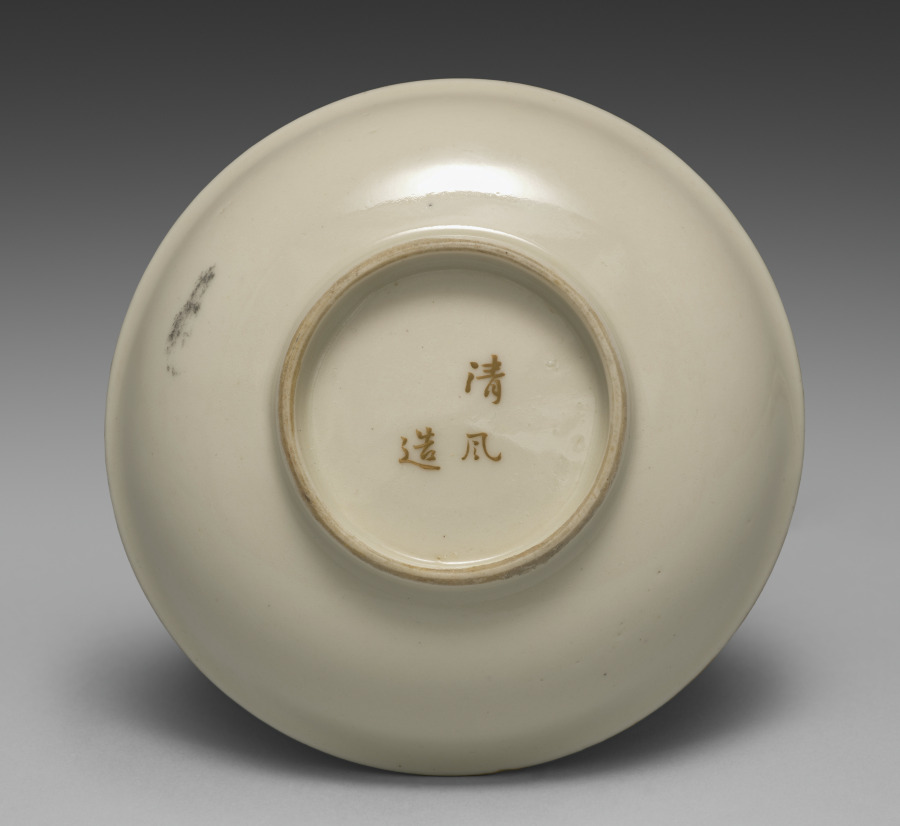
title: Small Dish from Dining Set with Plum Blossoms and Cracked-Ice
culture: Japan, Meiji period (1868–1912)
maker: Seifū Yohei II (Japanese, 1844–1878)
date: c. 1875–78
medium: Porcelain with molded designs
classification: Ceramic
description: Each item in this set has a delicate low-relief design of flowering plum branches over scattered, intersecting lines meant to resemble the cracked-ice surface of a frozen body of water and is signed on the base in gold pigment. While Yohei II produced many fine works in underglaze blue, like those produced by Kiyomizu Shichibei, he also made works in quite different styles later in his career, from the early 1870 s. In 1873, he was appointed purveyor to the Industrial Center of Kyoto Prefecture, a designation associated with Kyoto’s efforts to reach an international market through the port of Kobe; and from 1875 until his death, he was involved in national-level projects to present Japanese ceramics across the world. It was during this period that Yohei III was apprenticed to Yohei II, and it has been suggested that this set may in fact be an early example of Yohei III’s work, which he signed with his teacher’s name. Decorated with flowers resembling Japanese textile motifs, the set calls to mind the design of Yohei II’s pair of vases with plum blossoms in the Victoria and Albert Museum. Here, the elaborate trees created for a formal public exhibition setting have been translated into the approachable blossoms of the genteel domestic environment. While the designs are consistent across the pieces, each raised flower petal and pistil and each incised line in the ice was done by hand, so the cups, bowls, and dishes are similar yet unique. The bottoms of two boxes once identified the set’s owner, but the information has been deliberately obscured with black ink. However, inscriptions still visible appear to indicate two occasions, once at the end of July 1886 , and once again in June 1916 , when parts of the set were requested from Hokura in Niigata Prefecture. The location corresponds to a neighborhood in the present-day city of Jōetsu. The surname Tsuji 辻 also appears on a paper tag affixed to one of the box cloths. Future research may possibly reveal more about their provenance. A vase by Yohei III in a private collection combines the formal grandeur of the Yohei II vases in the Victoria and Albert Museum with the gentler design of this dining set, placing flowering plum trees against soft, scalloped-edge clouds resembling those in golden screens.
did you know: The dining wares have a creamy white coloration that the four boxes containing them identify as Korean in style.